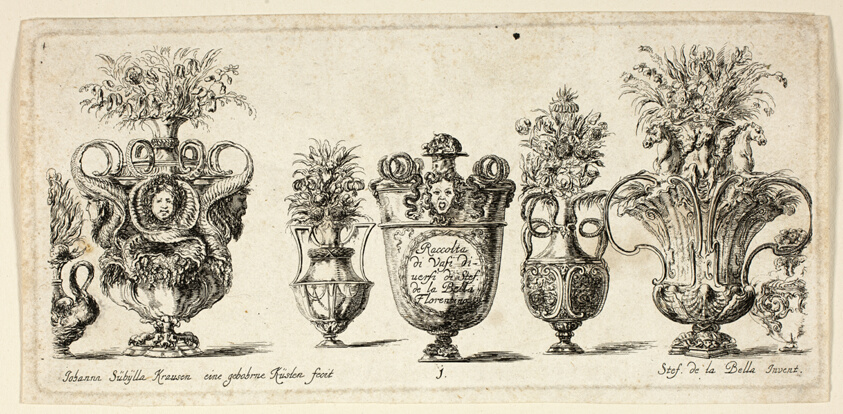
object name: Print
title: Plate One from Raccolta di Vasi diversi di Stef. de la Bella Fiorentino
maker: Johanna Sibylla Küsel (German, active late 17th-early 18th century); after Stefano della Bella (Italian, 1610-1664)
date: 1646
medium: Etching on paper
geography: Germany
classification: etching; print; prints and drawing